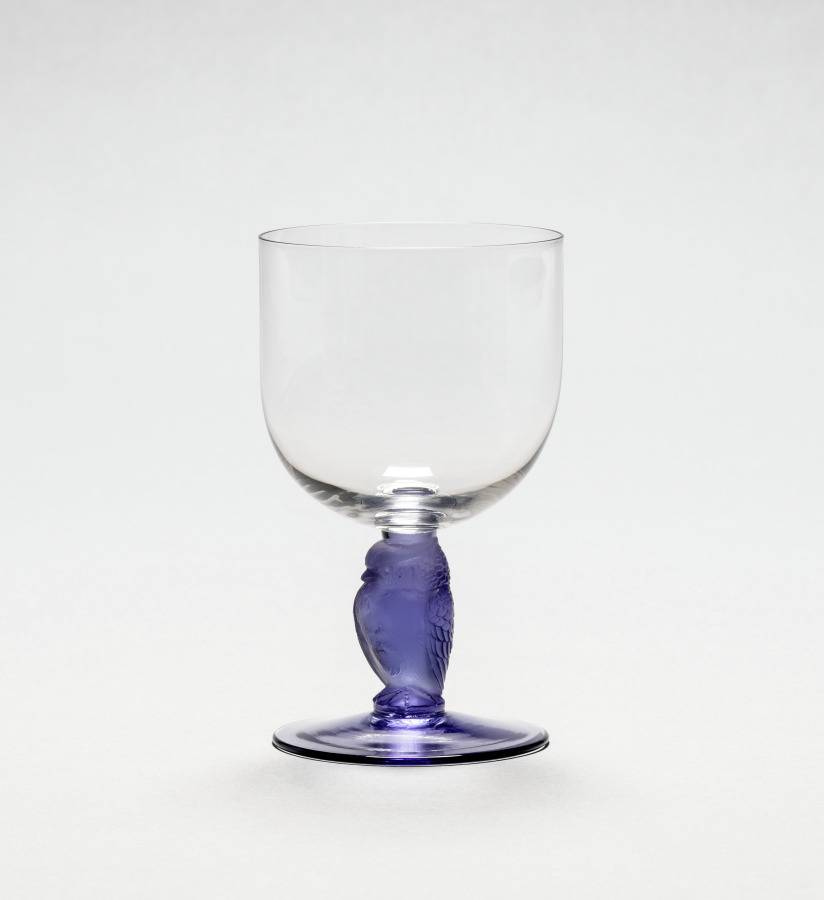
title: Raptor Goblet (Verre rapace)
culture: France, 20th century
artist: René Lalique (French, 1860–1945)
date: c. 1929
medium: Cast and blown glass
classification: Glass